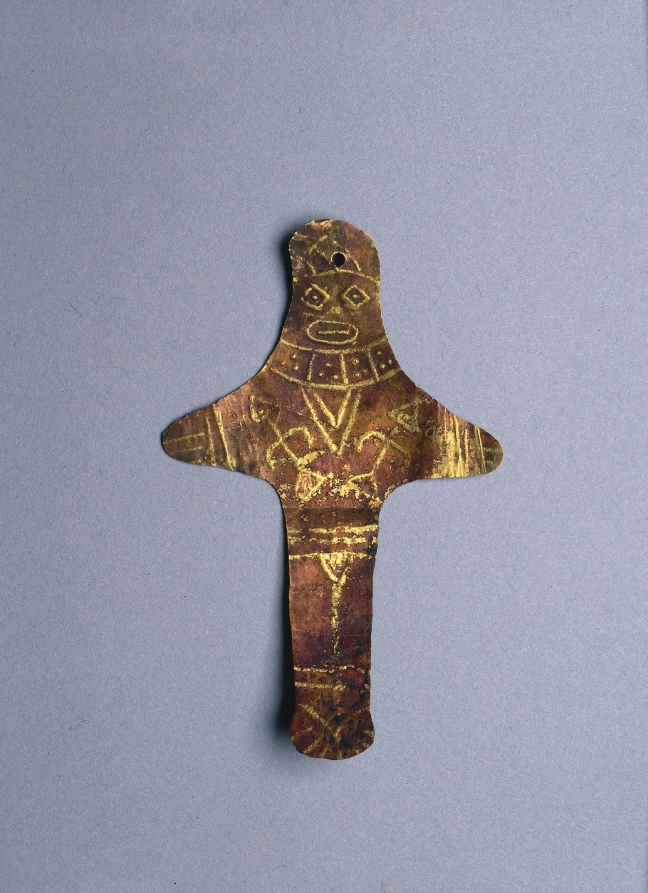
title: Figurine Plaque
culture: Peru, South Coast, Paracas, with modern etched enhancement(?)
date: c. 300 BCE–200 CE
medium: hammered and embossed gold-copper alloy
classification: Jewelry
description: This small metal ornament represents a human figure wearing a cap, a tunic decorated with bird images, and a necklace of orange-pink spondylus shell sections. Such necklaces are found in Paracas mummy bundles, and are frequently represented in Paracas embroidered images. Spondylus shell does not grow in the cold water off the coast of Peru, and had to be imported hundreds of miles from what is now Ecuador. Virtually all ancient Peruvian cultures treasured spondylus shell for its color and rarity, and as a symbol of fertility.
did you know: Tumbaga is an alloy made by blending gold with copper, which may give the gold a rosy hue.